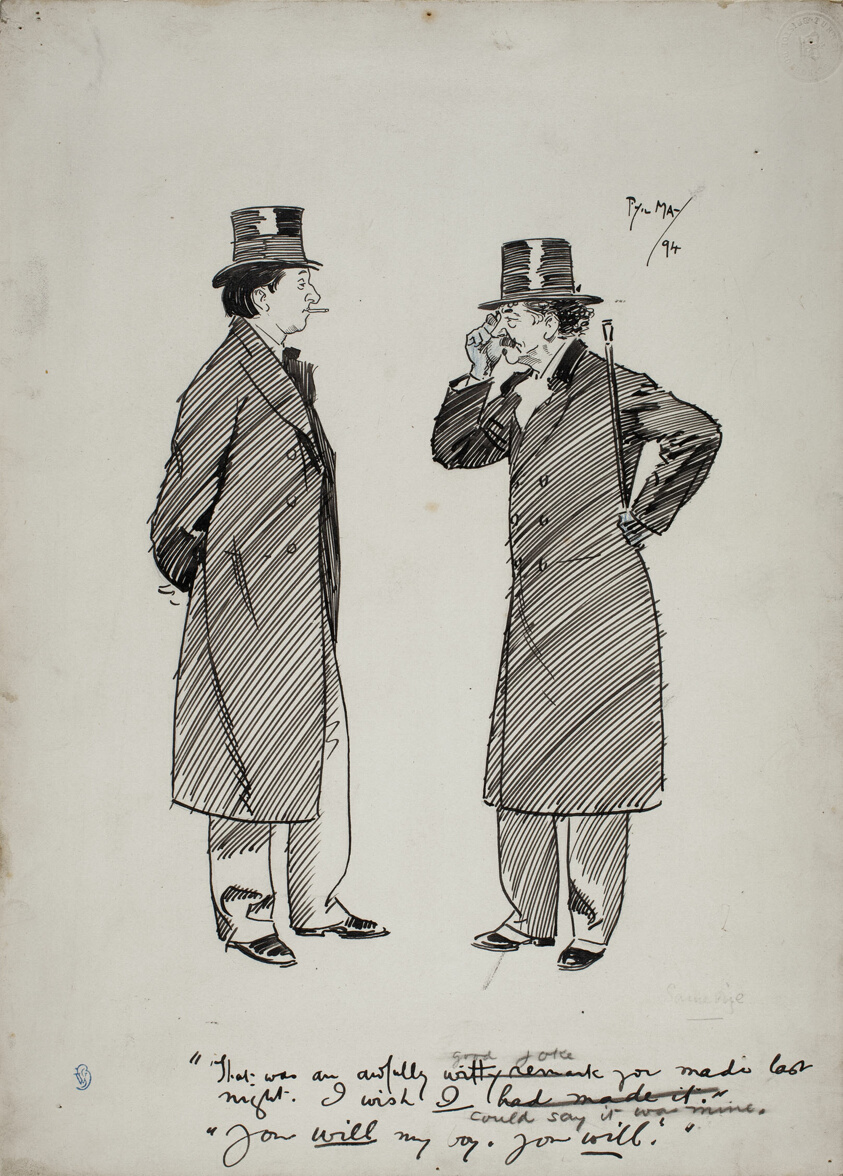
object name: Drawing and Watercolor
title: Oscar Wilde and Whistler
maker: Philip William May (English, 1864-1903)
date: 1894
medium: Pen and black ink, with black crayon and touches of blue crayon, on ivory laminate board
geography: England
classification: pen and ink drawings; drawings (visual works); prints and drawing